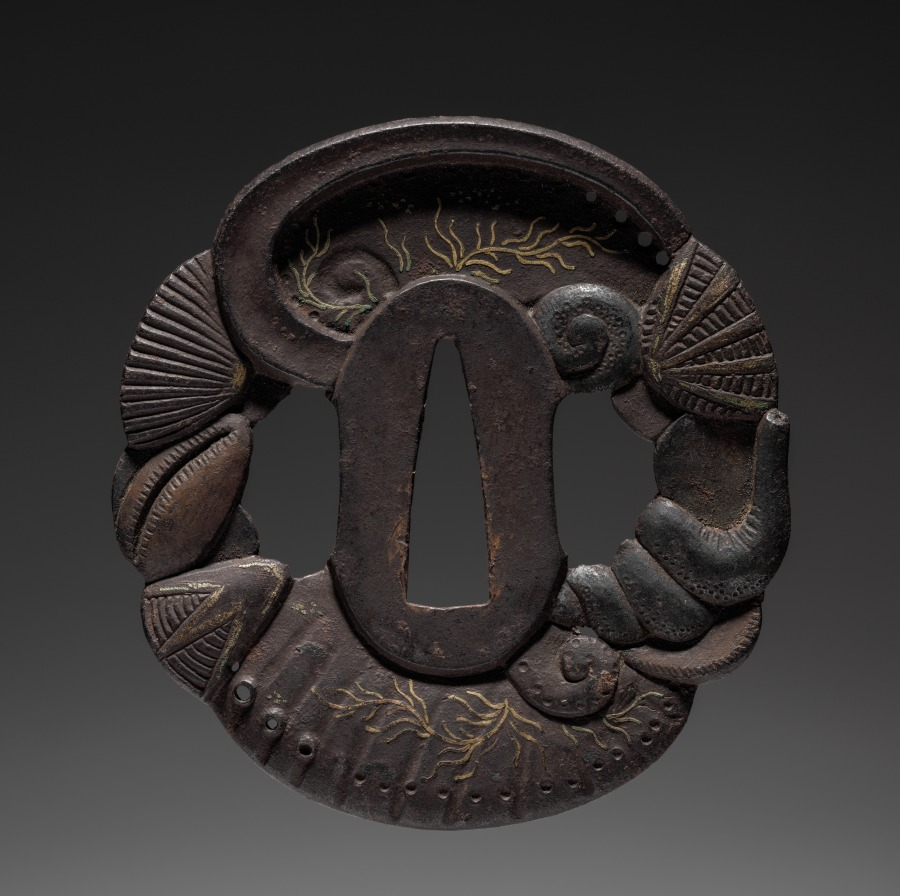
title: Sword Guard (Tsuba) with Shells and Seaweed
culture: Japan, possibly Edo period (1615–1868)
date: c. 1615–1868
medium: metal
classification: Arms and Armor